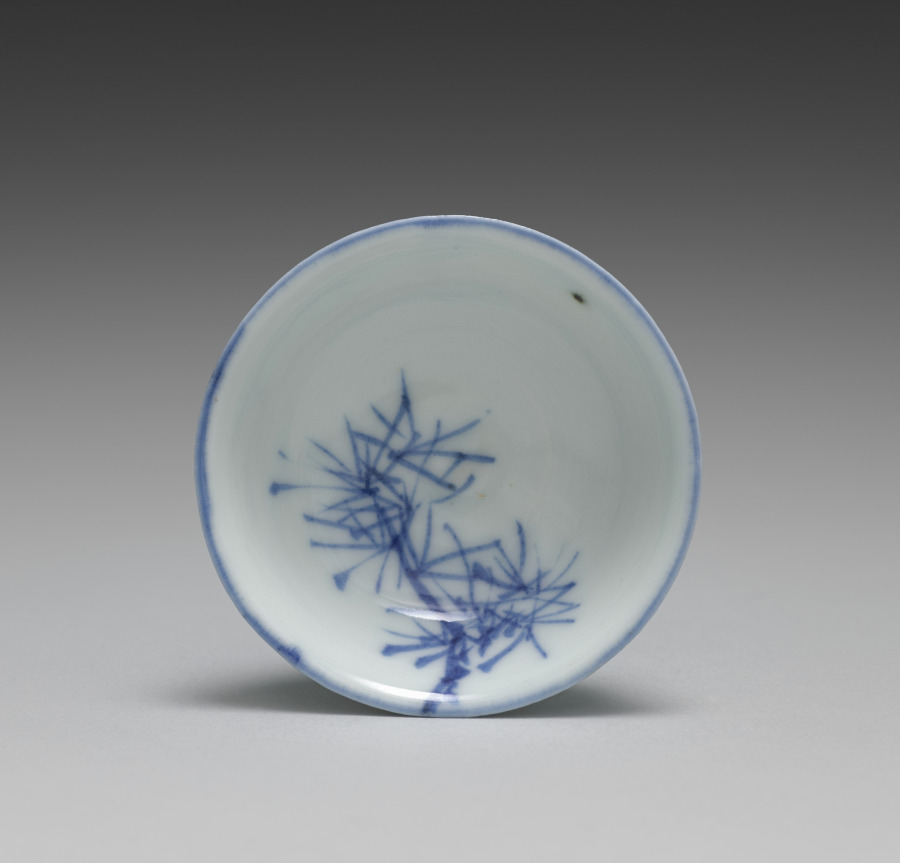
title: Sake Cup with Auspicious Plants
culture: Japan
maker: Seifū Yohei II (Japanese, 1844–1878)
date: 1861–78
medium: One of a pair of sake cups; porcelain with underglaze blue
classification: Ceramic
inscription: 松梅芝仙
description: Seifū Yohei II excelled as a painter, as evidenced by his floral and landscape designs. His works were selected as the best among Kyoto ceramics shown to jurists from Europe and the US, thus paving the way for international recognition of the studio in the late 1800s.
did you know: The plum and the pine are two of the "Three Friends of Winter," auspicious symbols of a cultured scholar's virtues: steadfastness, resilience, and flexibility.